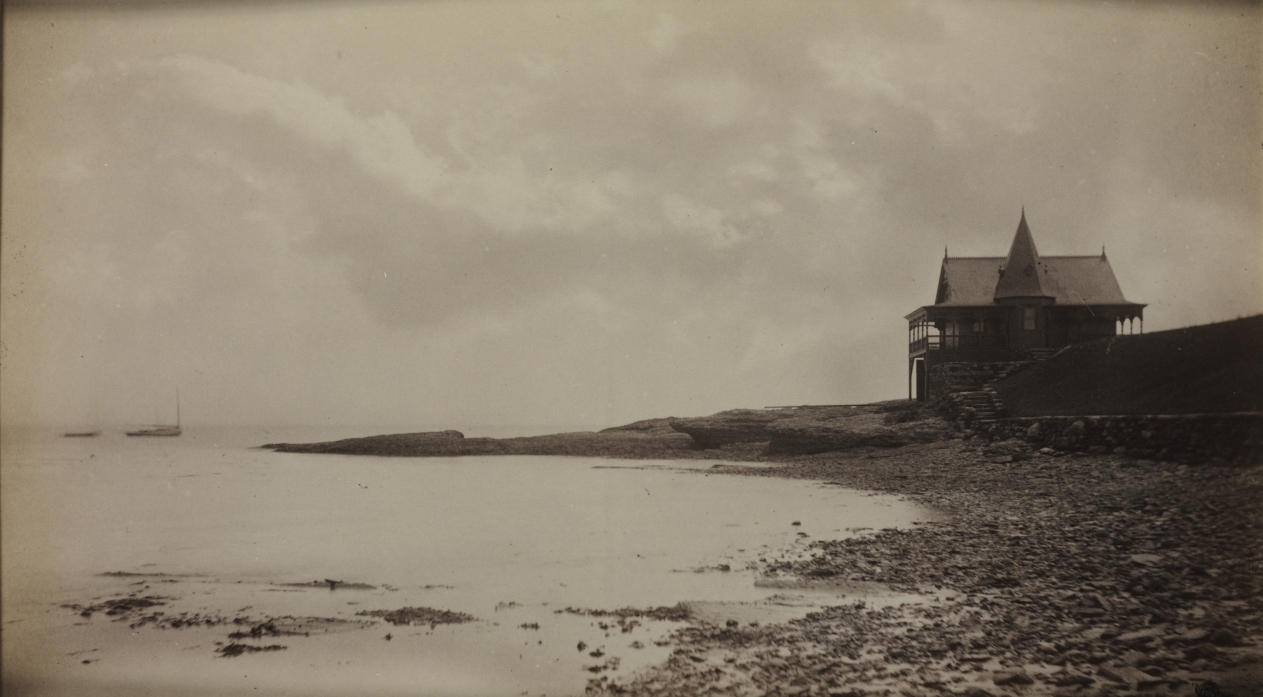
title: Edwin Booth's Boat House, Near Newport, August 6, 1884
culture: America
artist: Louise Deshong Woodbridge (American, 1848–1925)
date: 1884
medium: albumen print from gelatin dry plate negative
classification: Photograph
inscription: Written in pencil on recto: "20"; in pencil on verso: "Aug 6th 1884. Edwin Booth's Boat House / Near Newport. Aug 6th AM"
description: Woodbridge, a Philadelphia socialite, was a gifted amateur photographer active from 1884 through 1915. This stark seascape is an excellent early example of her photographs that stress light and atmospheric effects. The boathouse provides a sense of scale in this grand, sweeping scene dominated by a rocky beach and cloud-filled sky. Her photographs are distinguished by a successful union of factual detail and broad tonal effects.